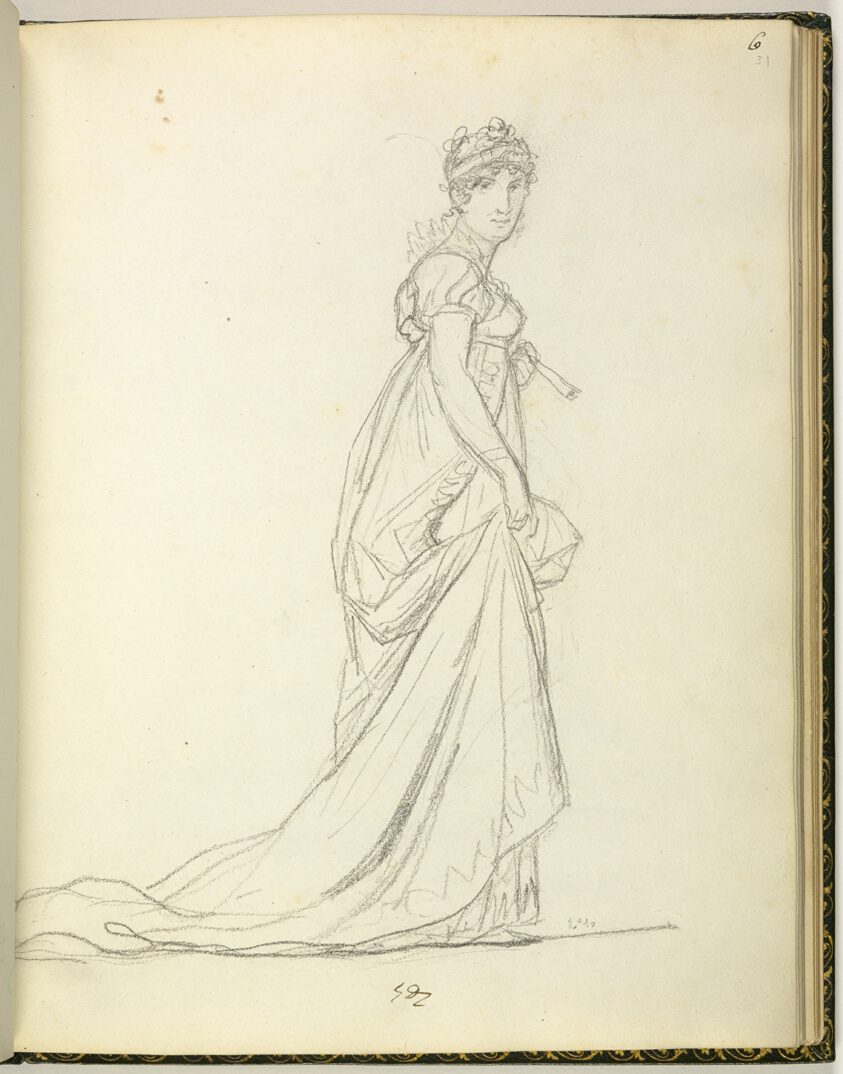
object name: Drawing and Watercolor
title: Sketchbook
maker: Jacques-Louis David; French, 1748-1825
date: 1809–10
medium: Graphite, black chalk, black crayon, and pen and brown ink drawings on wove paper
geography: France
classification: sketchbook; chalk; prints and drawing; paper